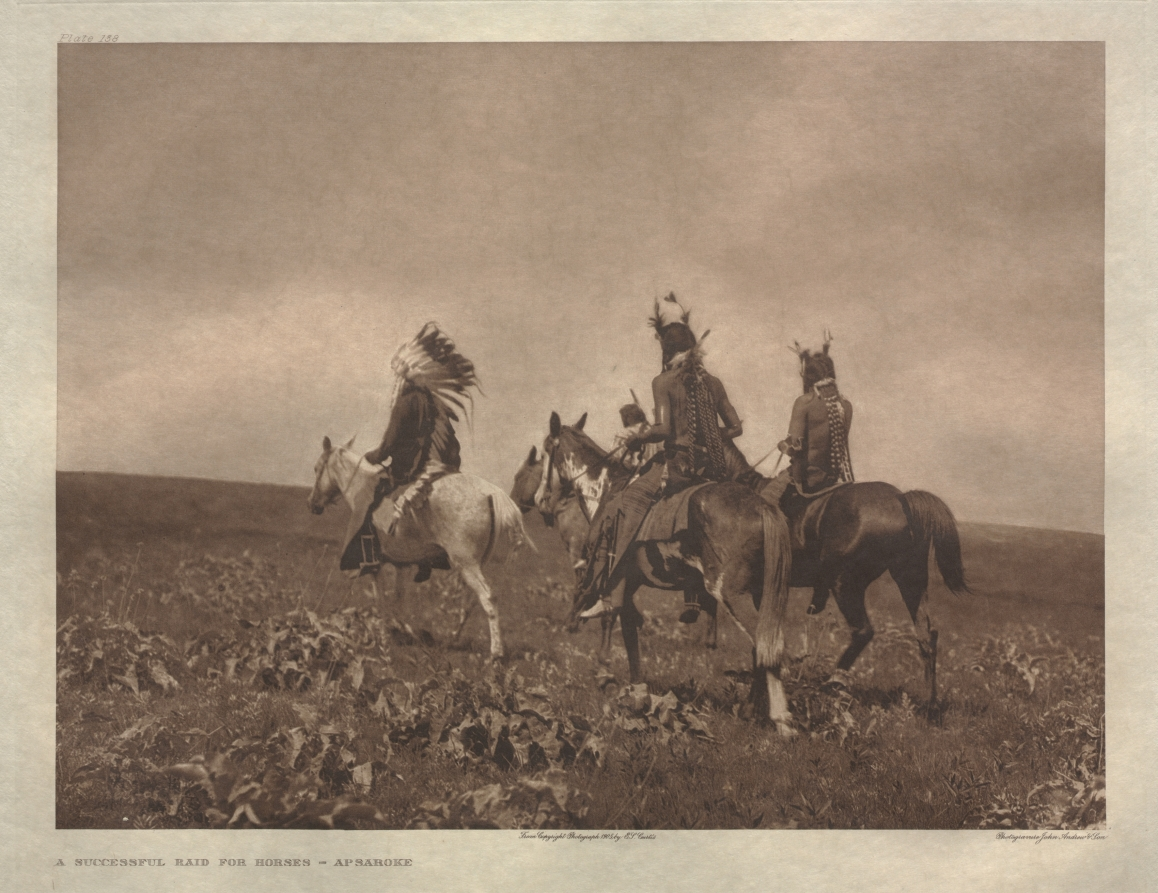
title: Portfolio IV, Plate 138: A Successful Raid for Horses--Apsaroke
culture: America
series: The North American Indian: being a series of Portfolios picturing and describing the Indians of the United States, the Dominion of Canada, and Alaska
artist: Edward S. Curtis (American, 1868–1952)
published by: The University Press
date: 1905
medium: photogravure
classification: Portfolio